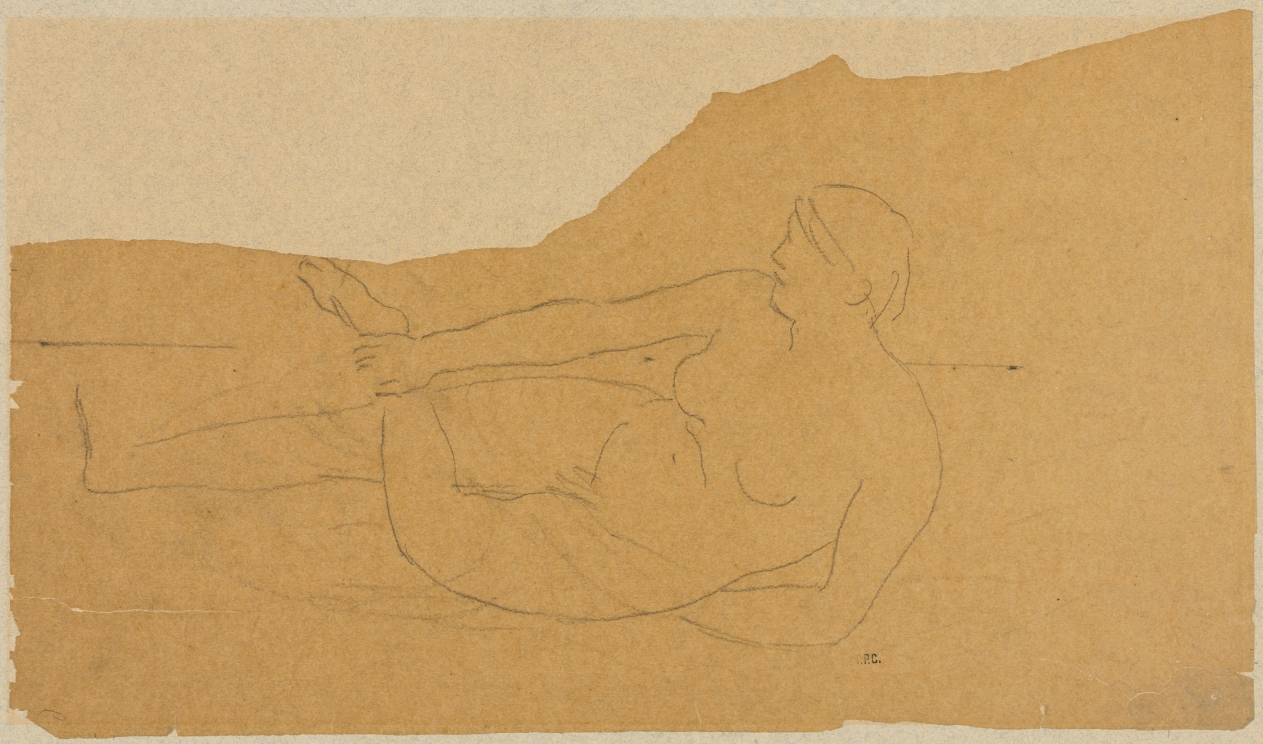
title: Female Nude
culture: France, 19th century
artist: Pierre Puvis de Chavannes (French, 1824–1898)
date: 1891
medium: black chalk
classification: Drawing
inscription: lower right, in graphite: [C ?] ; VERSO OF SECONDARY SUPPORT, lower left, in graphite: Quinn sale Feb 10(?) 1927 / Drwg from portfolio 404 bought by AB Davies [parentheses part of inscription] ; lower right, in graphite: 404/2[5?] ; ON SEPARATELY APPLIED PIECE OF PAPER, verso of secondary support, upper center, printed in brown ink on green paper: DURAND-RUEL / PARIS, 18 Rue Laffitte / NEW-YORK, 389, Fifth avenue / P. de Chavannes [inscribed in brown ink] No 6500 [6500 inscribed in brown ink] / Etude. [inscribed in brown ink] ; ON SEPARATELY APPLIED PIECE OF PAPER, verso of secondary support, upper right, in brown ink on pink paper: Chavannes No [No printed in black ink] 2432 [partially masked] / Etude